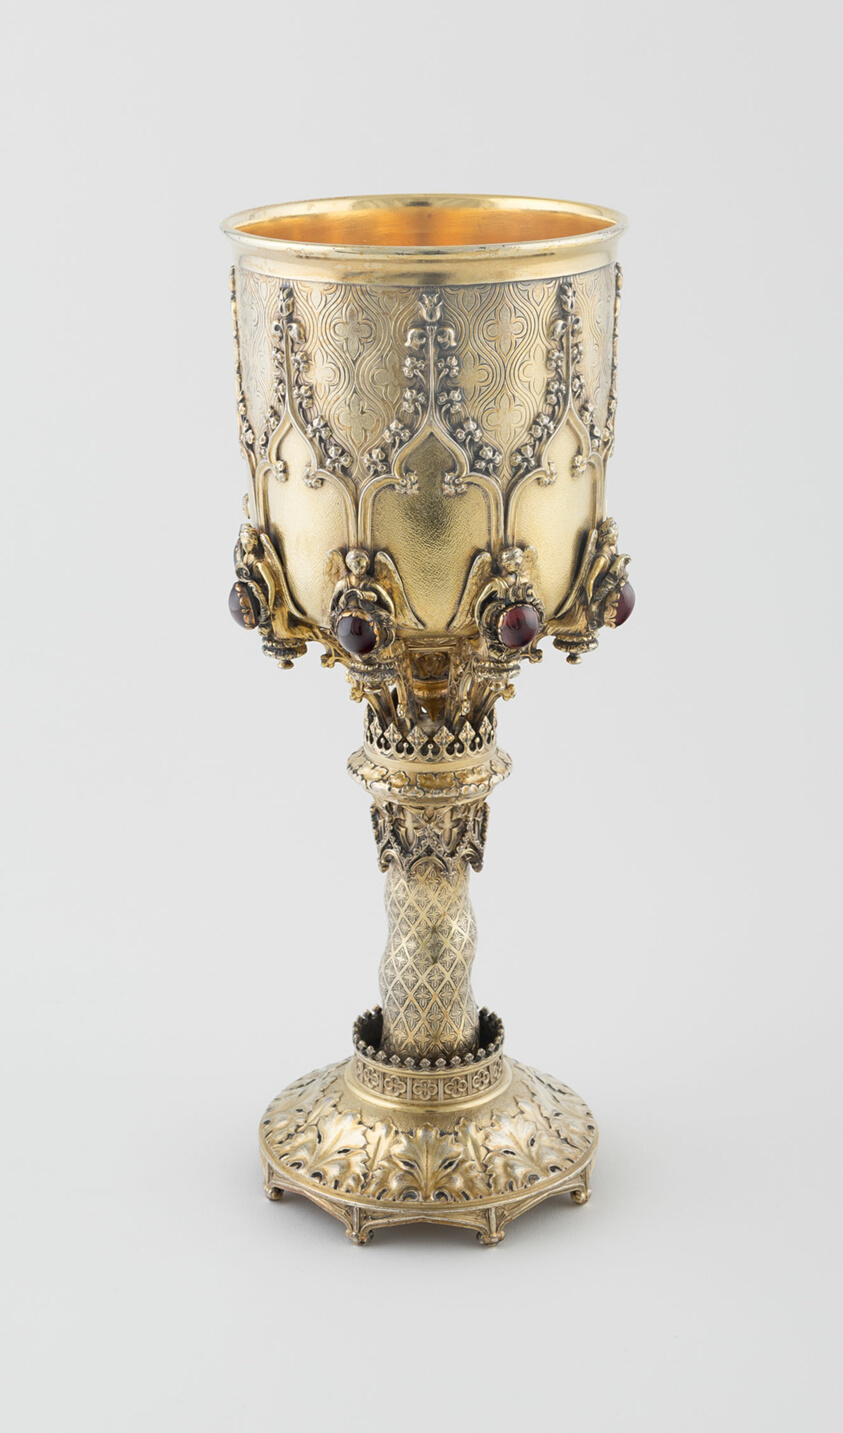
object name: Metalwork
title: Chalice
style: gothic revival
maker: Designed by Augustus Welby Northmore Pugin; English, 1812–1852; Made by Rundell, Bridge and Rundell; English, 1797–1843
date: 1827–28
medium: Silver gilt with spessartine garnets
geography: London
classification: chalices (liturginal vessels); vessel; metalwork